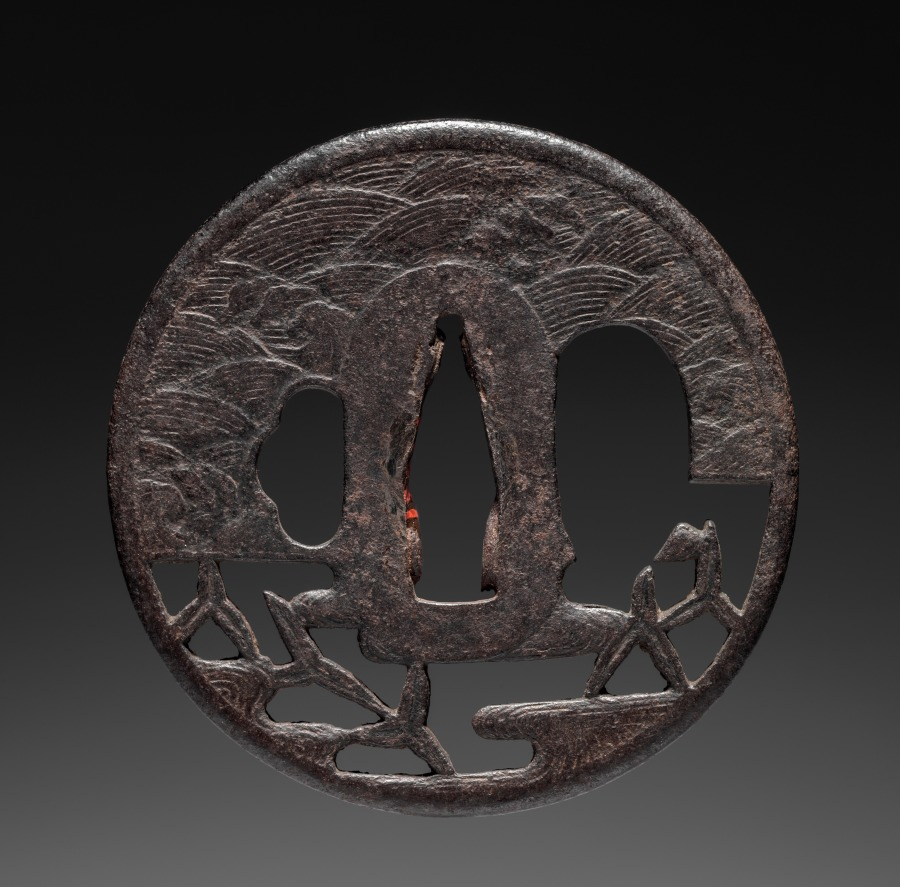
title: Sword Guard (Tsuba)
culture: Japan, possibly Edo period (1615-1868)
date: c. 1615–1868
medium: iron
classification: Arms and Armor